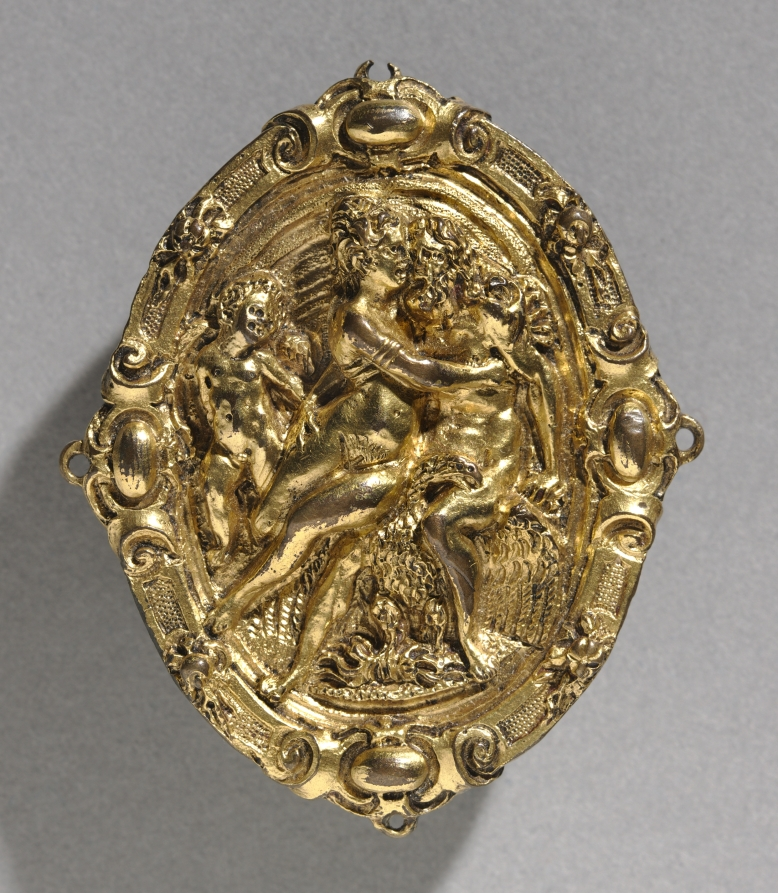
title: Jupiter and Juno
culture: Germany, late 16th century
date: late 1500s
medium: gilt bronze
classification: Sculpture